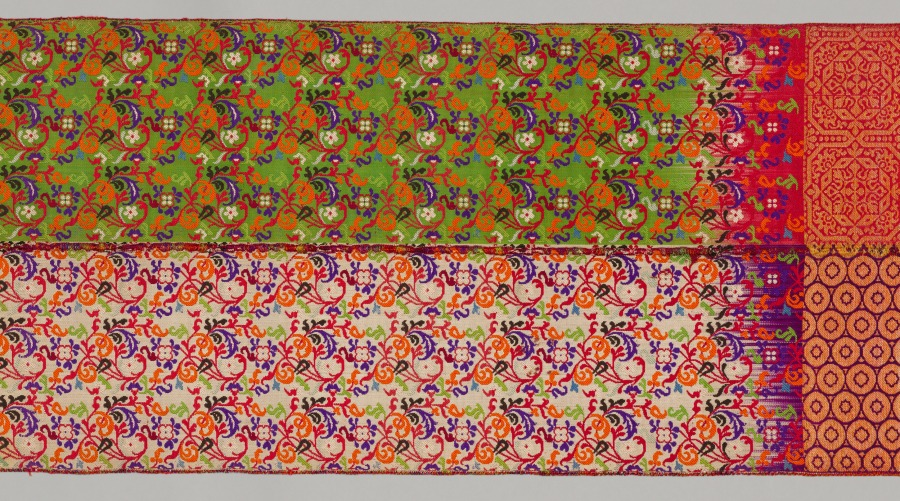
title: Belt (Hizam)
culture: Africa, North Africa, Morocco, Fes, Moroccan weaver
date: 1800s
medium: Silk, dye, metal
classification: Textile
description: Elaborate wedding sashes woven in Fez, Morocco, are distinctive for their multiple colors, designs, and uses. Folded lengthwise, they are wrapped around the waist so that the colors and designs coordinate with the attire worn during and after a wedding. Typically, the colors vary on each half although the designs are the same. Luxury textiles with elaborate patterns were woven on large looms called drawlooms that automatically repeated designs. The weaver operated the structure, inserting horizontal wefts, while the drawboy activated the programmed pattern. However, this wedding sash has ten programmed designs, which required considerable expertise.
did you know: Women sometimes added starch to stiffen these belts.